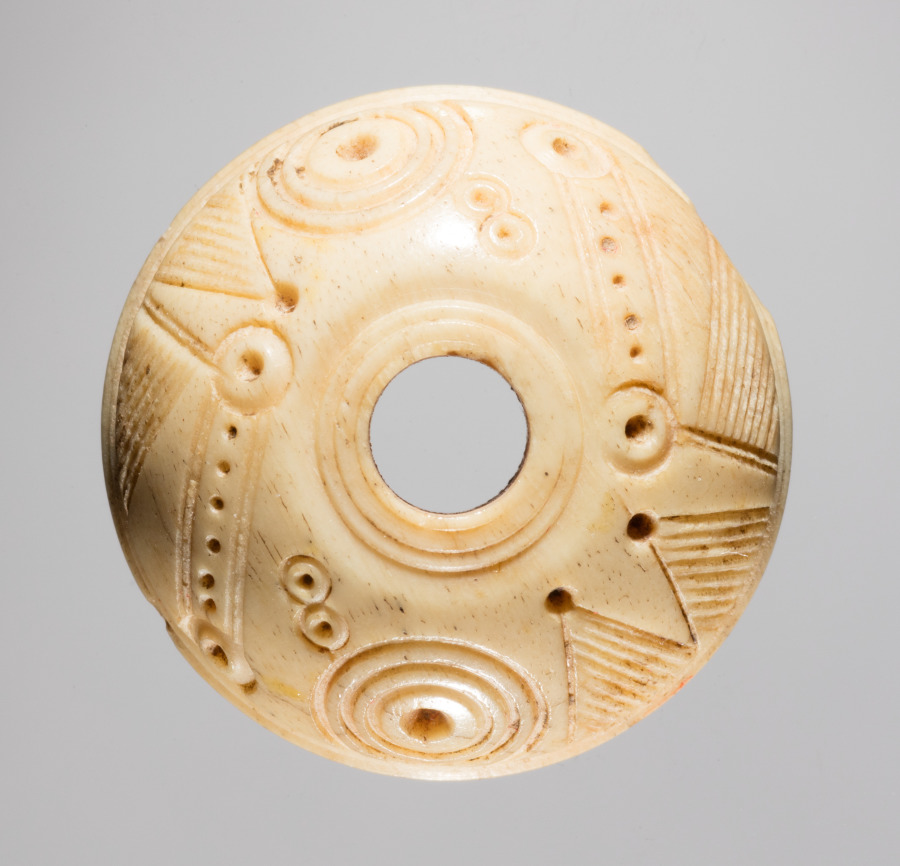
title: Spindle Whorl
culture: Iran, early Islamic period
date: 700s - 900s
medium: bone, incised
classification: Spindle Whorl